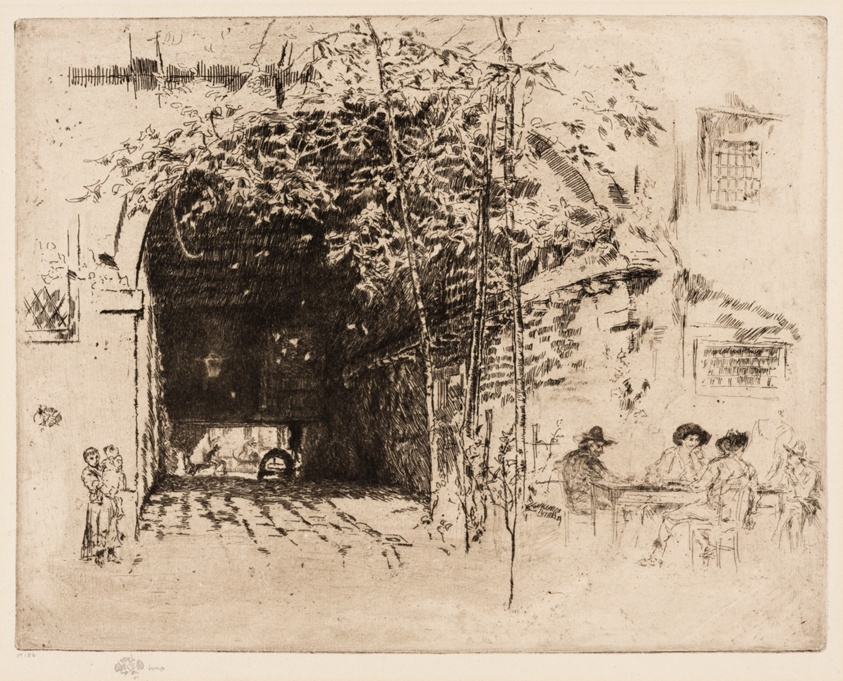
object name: Print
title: The Traghetto, No. 2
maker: James McNeill Whistler (American, 1834-1903)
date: 1880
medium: Etching and drypoint with foul biting in black ink on ivory laid paper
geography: United States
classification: etching; foul biting; print; prints and drawing; paper; drypoint